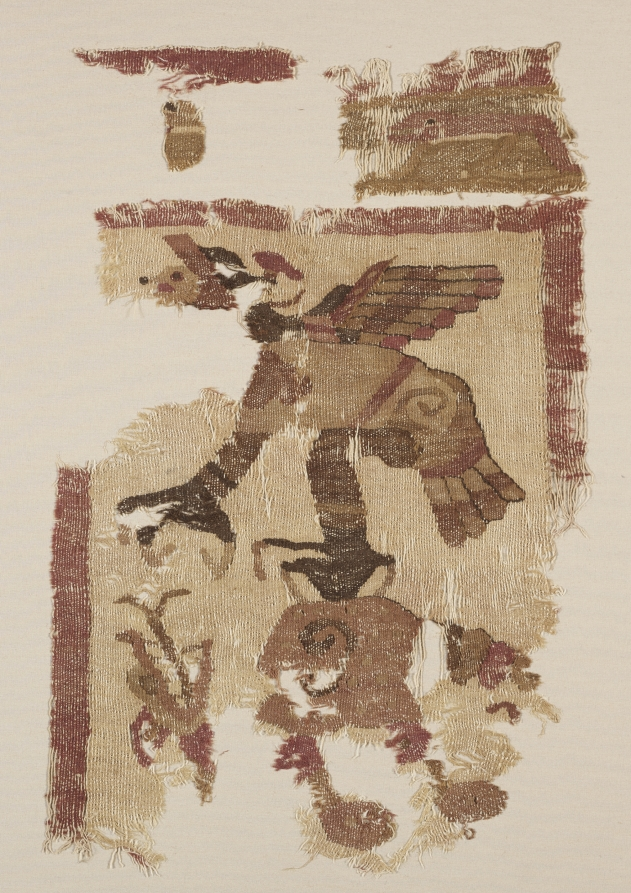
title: Textile Fragment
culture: Peru, Moche, north coast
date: c. 50–650 CE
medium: cotton and camelid fiber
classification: Textile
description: This fragment, one of several in the collection, is a rare survivor of catastrophic rains that destroyed much of the Moche textile legacy and may have helped to bring about the decline of Moche culture. It depicts a serpent and a snail beneath a hovering raptorial bird—perhaps a snail kite, a type of hawk named after its favored food. The size of the motifs implies that the original textile was large; a mantle (a shawl-like garment) or a hanging are among the possibilities.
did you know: This fragment is a rare survivor of floods that destroyed much of the Moche textile record.